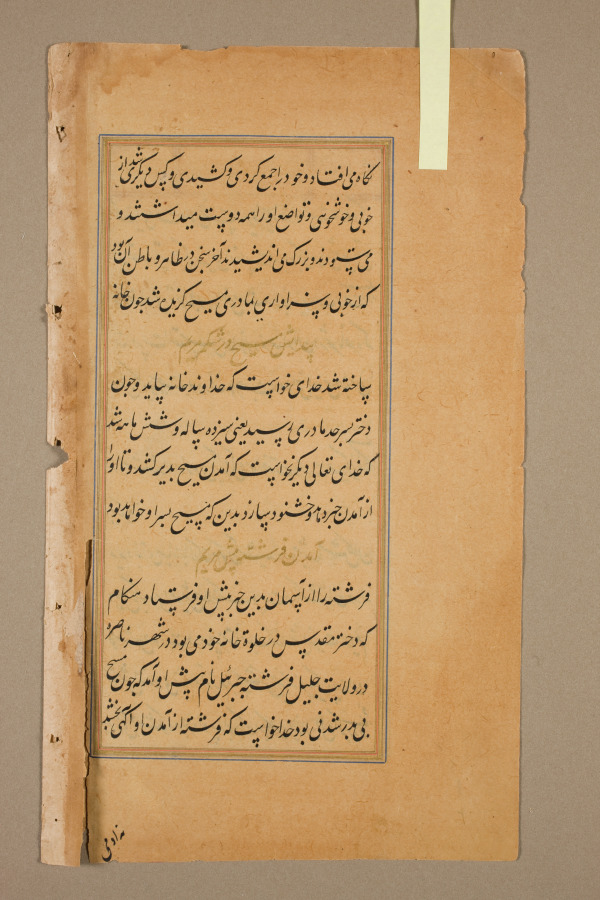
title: Text, folio 13 (verso), from a Mirror of Holiness (Mir’at al-quds) of Father Jerome Xavier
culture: Mughal India, Allahabad, made for Prince Salim (1569–1627)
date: 1602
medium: Ink and gold on paper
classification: Manuscript